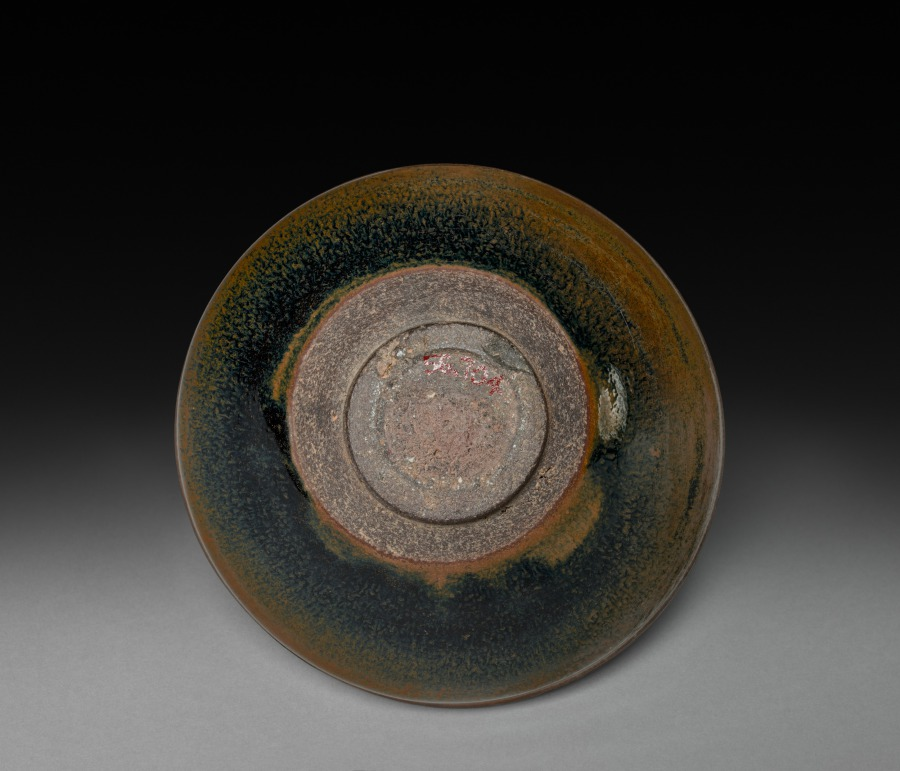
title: Tea Bowl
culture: China, Fujian province, Song dynasty (960-1279)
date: 960–1279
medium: purplish brown stoneware with iron slip glaze coating, Jian ware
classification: Ceramic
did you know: Jian ware was very popular with the tea cultures in China and Japan.